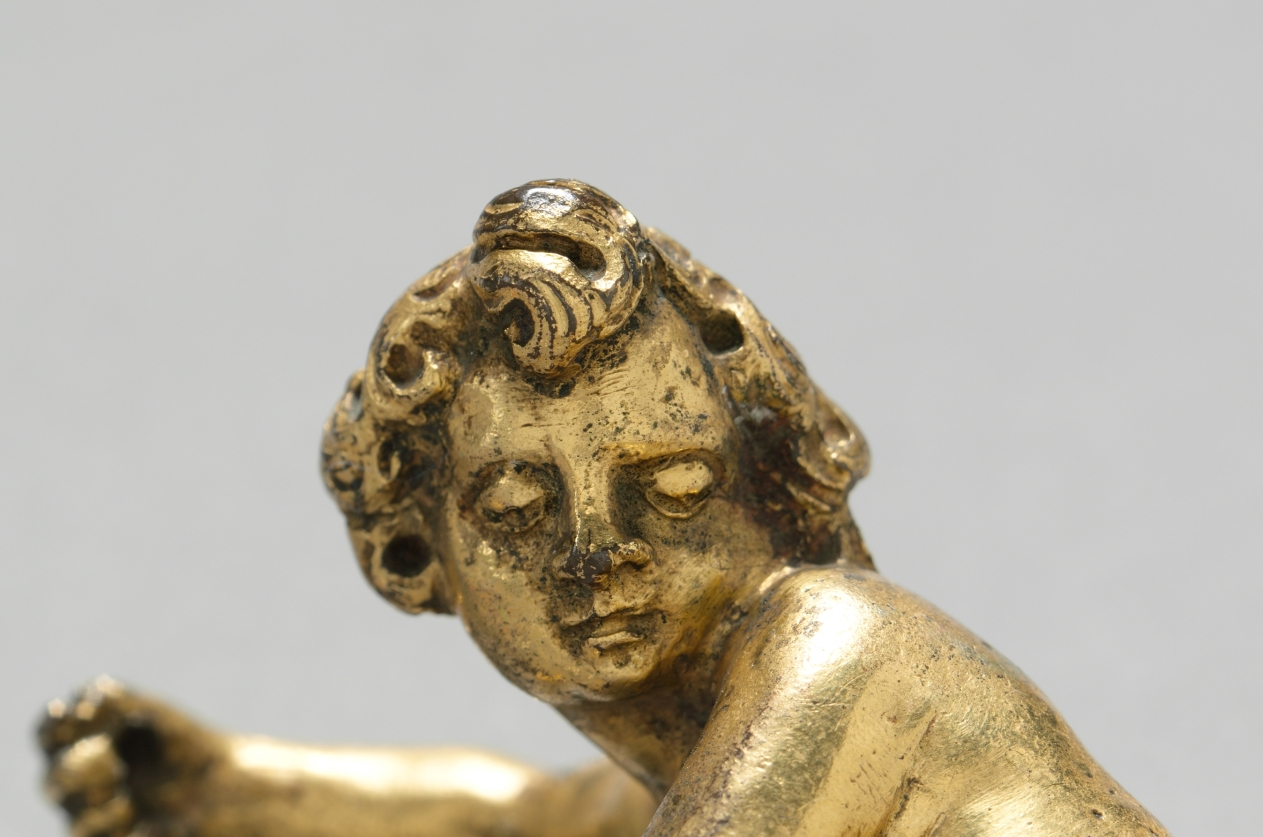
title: Putto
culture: Italy, Rome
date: late 1500s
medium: gilt bronze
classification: Sculpture